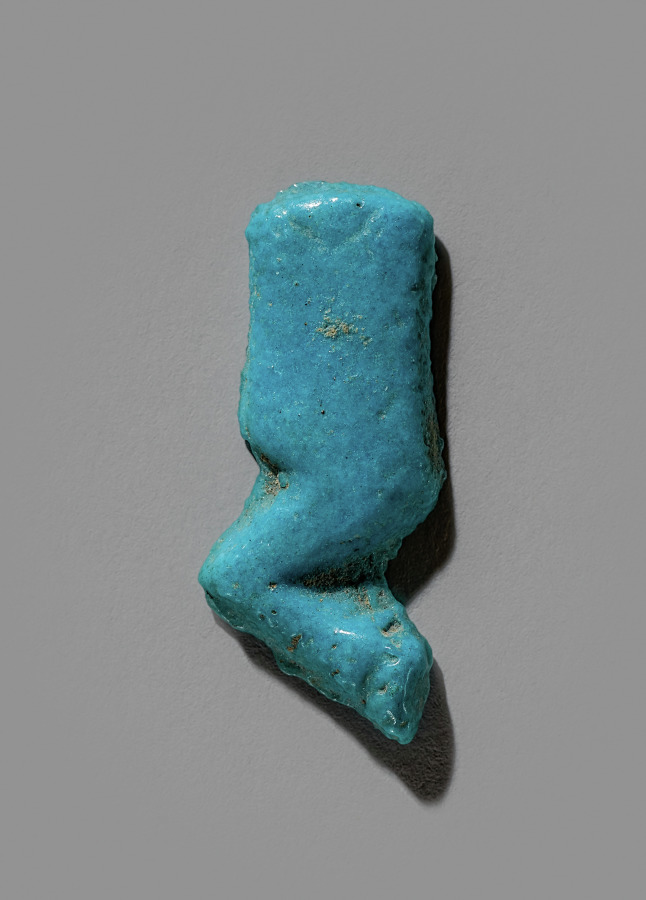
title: Food Model Amulet: Haunch of Beef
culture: Egypt, New Kingdom (1540–1069 BCE), Dynasties 19–20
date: 1295–1069 BCE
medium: turquoise faience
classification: Amulets